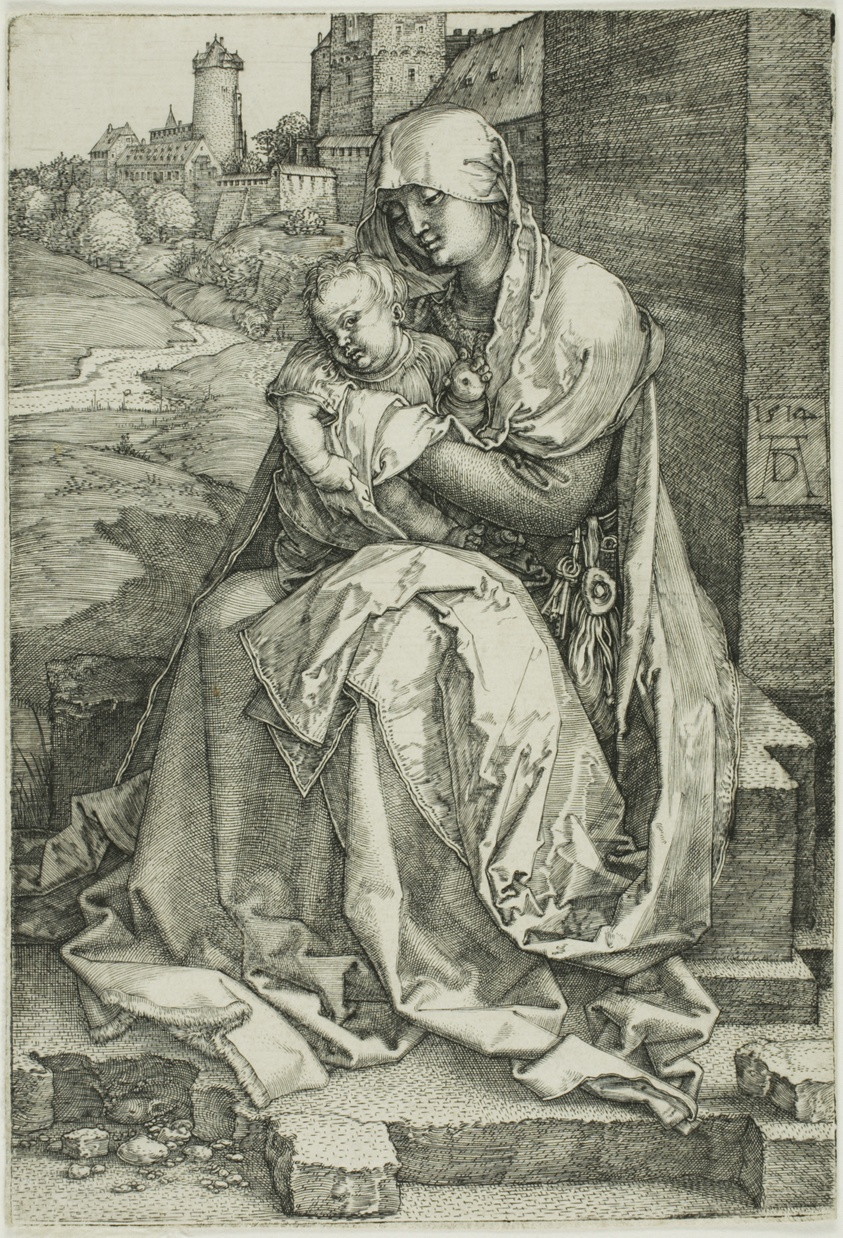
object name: Print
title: Madonna by the Wall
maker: Albrecht Dürer (German, 1471-1528)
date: 1514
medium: Engraving in black on ivory laid paper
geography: Germany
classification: engraving; print; prints and drawing; paper